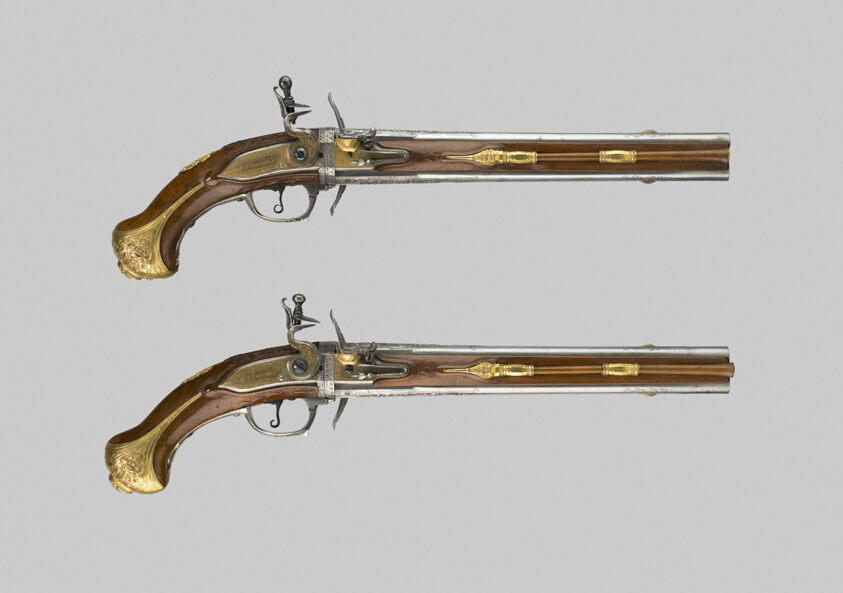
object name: Arms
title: Double-Barrel Revolving Flintlock Holster Pistol (One of a Pair)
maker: Gunsmith: T. (Thomas) Thiermay (Flemish, active about 1720-50); Barrelsmith: Daniel Thiermay (Flemish, active about 1700-40); Liège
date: 1720/30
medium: Steel, brass, gilding, and walnut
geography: Liège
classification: firearm-handgun; arms; arms and armor